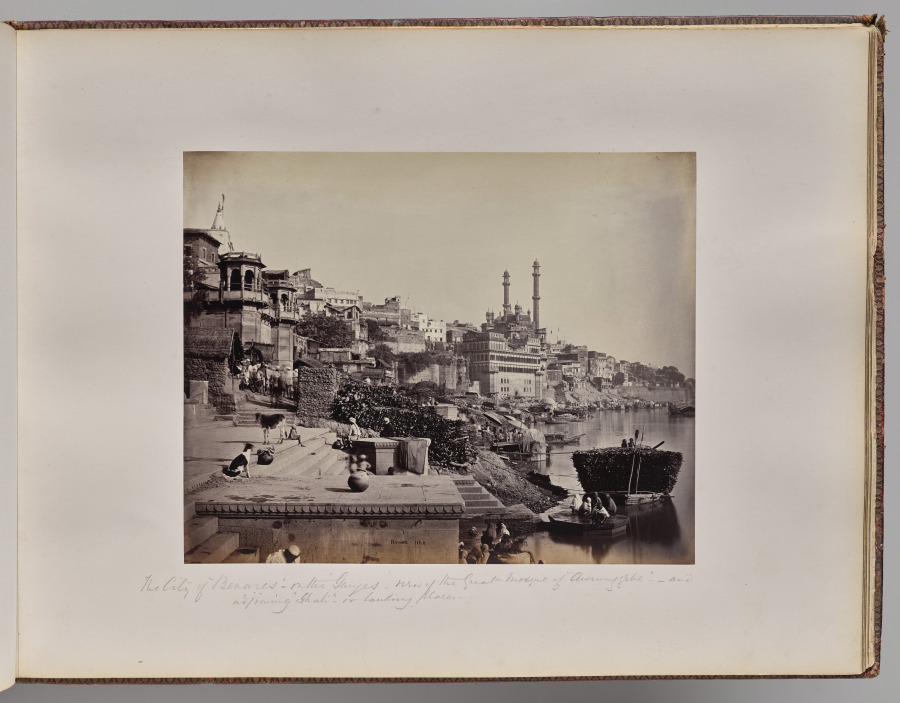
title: The City of Benares, on the Ganges, View of the Great Mosque of A (?) and Adjoining Landing Places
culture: England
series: Photographs of Northern India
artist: Samuel Bourne (British, 1834–1912)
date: 1863–70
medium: albumen print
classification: Photograph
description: The 50 images in this album, all taken in the 1860s, move from the hill towns of the Himalayas down to cities including Lahore (now in Pakistan), Delhi, Lucknow, Agra, Benares (now Varansi), and Calcutta (now Kolkata). Architectural studies of major monuments offer valuable historical records of what sites such as the Taj Mahal and the imperial mosque of the Mughal emperors in Delhi looked like before 20th-century restorations.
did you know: Samuel Bourne, the author of most the images in this album, was a banker in England before he moved to India to become a professional photographer.